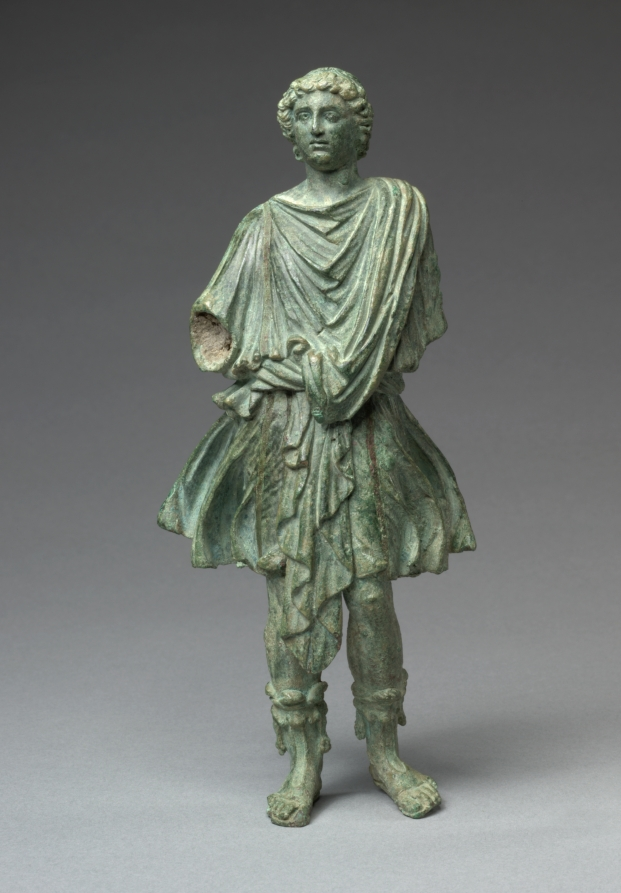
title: Lar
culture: Italy, Rome, Early Imperial period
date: 1–25 CE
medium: bronze with copper inlays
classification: Sculpture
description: This youthful bronze figure wears a short tunic with copper inlaid stripes and open-toed boots with animal-skin liners. The figure’s arms are missing, but based on other surviving examples, they likely held a libation dish and cornucopia. Even without these attributes, the figure can be identified through dress and stance as a type of Lar, or domestic deity, known as the Lar Familiaris (Household Lar), standing in a characteristic "quiet pose." Other types of Lares include the Lares Compitales and Lares Augusti (Lares of crossroads and of Augustus, respectively).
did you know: This statuette likely stood with other small bronzes in a household shrine called a lararium.